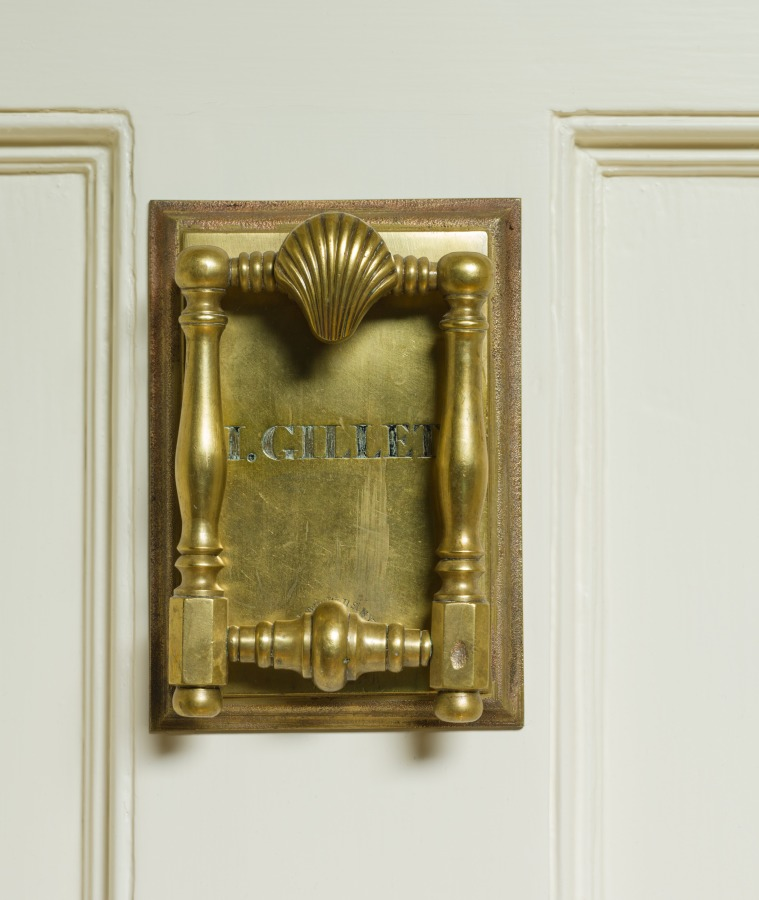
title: Door Knocker from the Isaac Gillet House, Painesville, Ohio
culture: America, Ohio, Painesville, 19th century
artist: Jonathan Goldsmith (American, 1783–1847)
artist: and Lewis Firm (American)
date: c. 1840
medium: brass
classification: Metalwork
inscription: engraved: "I. Gillet"; inscribed: "Lewis, Wall St. N.Y."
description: This elaborate doorway originally came from a house designed and built by Jonathan Goldsmith, one of the most celebrated early architects of Northeastern Ohio. Goldsmith, who was born in Connecticut and trained in Massachusetts, came to the area around 1802 and brought with him a knowledge of the prevailing classical styles in architecture and decoration. This doorway formed the most decorative element of the front of the Isaac Gillet House and features elements of both Greek (boldly carved acanthus leaves and swags) and Roman (tall, thin columns and flat window tracery) architecture.